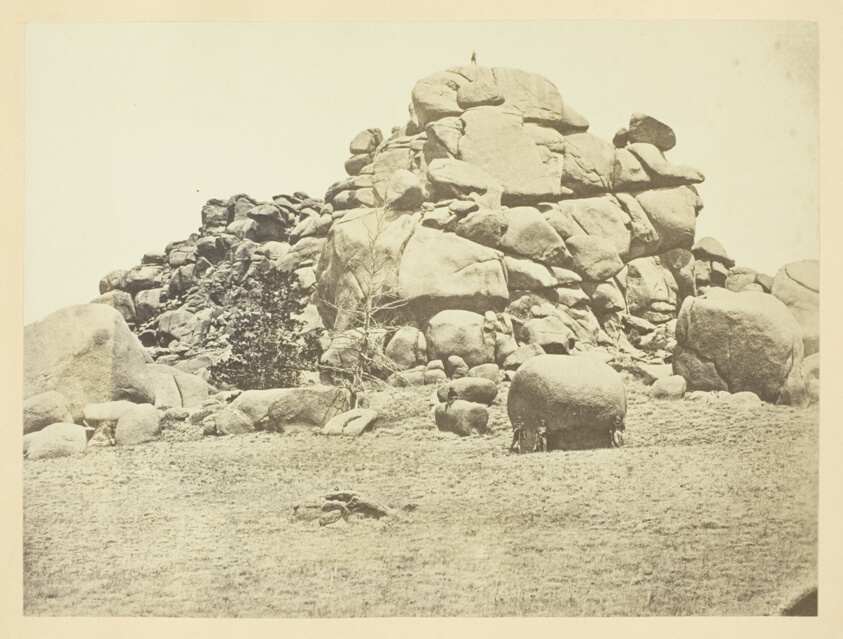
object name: Photograph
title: Skull Rock, (Granite) Sherman Station, Laramie Mountains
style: 19th century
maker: Andrew J. Russell; American, 1830–1902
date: 1868/69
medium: Albumen print, pl. III from the album "Sun Pictures of Rocky Mountain Scenery" (1870)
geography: United States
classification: photograph; albumen silver print; photography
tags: Collected by Hugh Edwards, landscapes